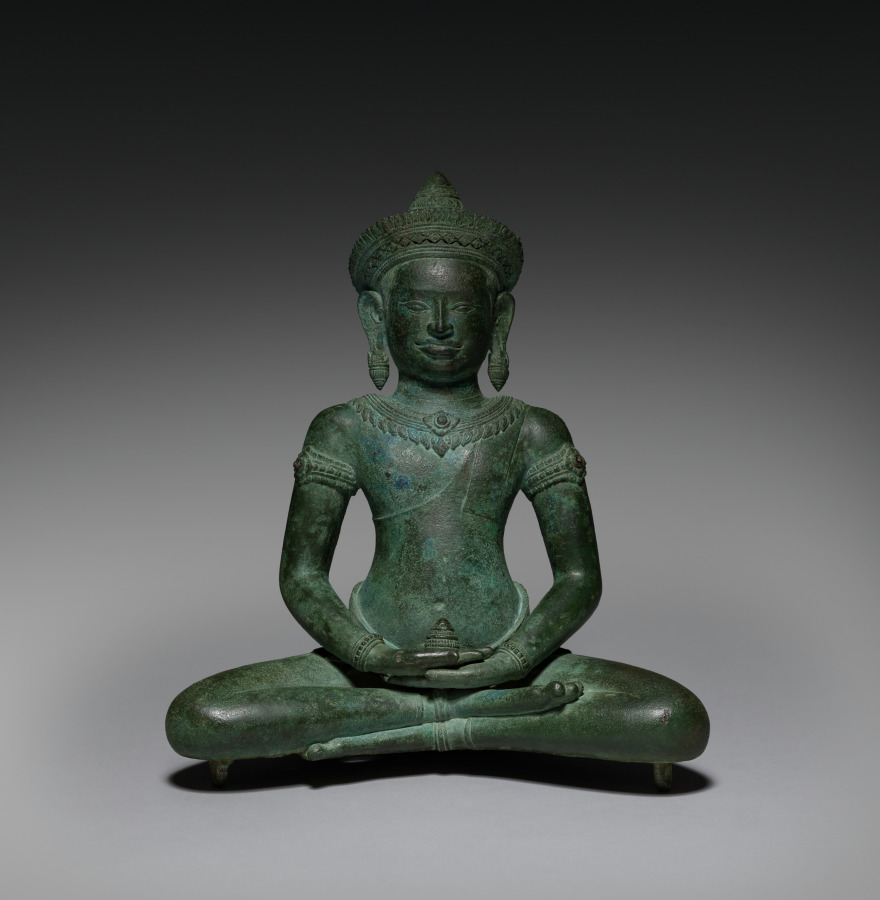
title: Naga-enthroned Buddha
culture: Cambodia, Angkor, Angkor Wat Period, 12th century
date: 1100–1150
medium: bronze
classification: Sculpture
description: Jayavarman VII, who built the great royal temple at Banteay Chhmar, linked himself with the image of the Buddha seated on a serpent, or naga, as the divine form under which he would be honored. During his reign, the naga-enthroned Buddha became a ubiquitous image for veneration, often set up together with Lokeshvara, who was associated with his father, and Prajnaparamita, the form under which his deceased mother was honored. Lokeshvara is the powerful enlightened being of compassion, while Prajnaparmita is the goddess who personifies wisdom. King Jayavarman VII, therefore, presented himself as the enlightened Buddha, the product of the union of Compassion and Wisdom, supported and glorified by the naga, which refers to the Khmer people. Images of the naga-enthroned Buddha have been found at Banteay Chhmar, both in architectural relief sculpture and as icons in the round. After the death of Jayavarman VII, followers of other forms of Buddhism (for example, Theravada) that became prevalent in Cambodia changed the meaning of the naga-enthroned Buddha and reinterpreted the image to refer to a scene from the historical Buddha’s life story in which a serpent protected him from a flood. The crowned and bejeweled aspect of this Buddha, though, indicates that it is another kind of transcendent figure. In his lap his hands are in a posture of meditation, holding what appears to be an offering of ceremonial rice referring to the hope that he will ensure the prosperity of the land.